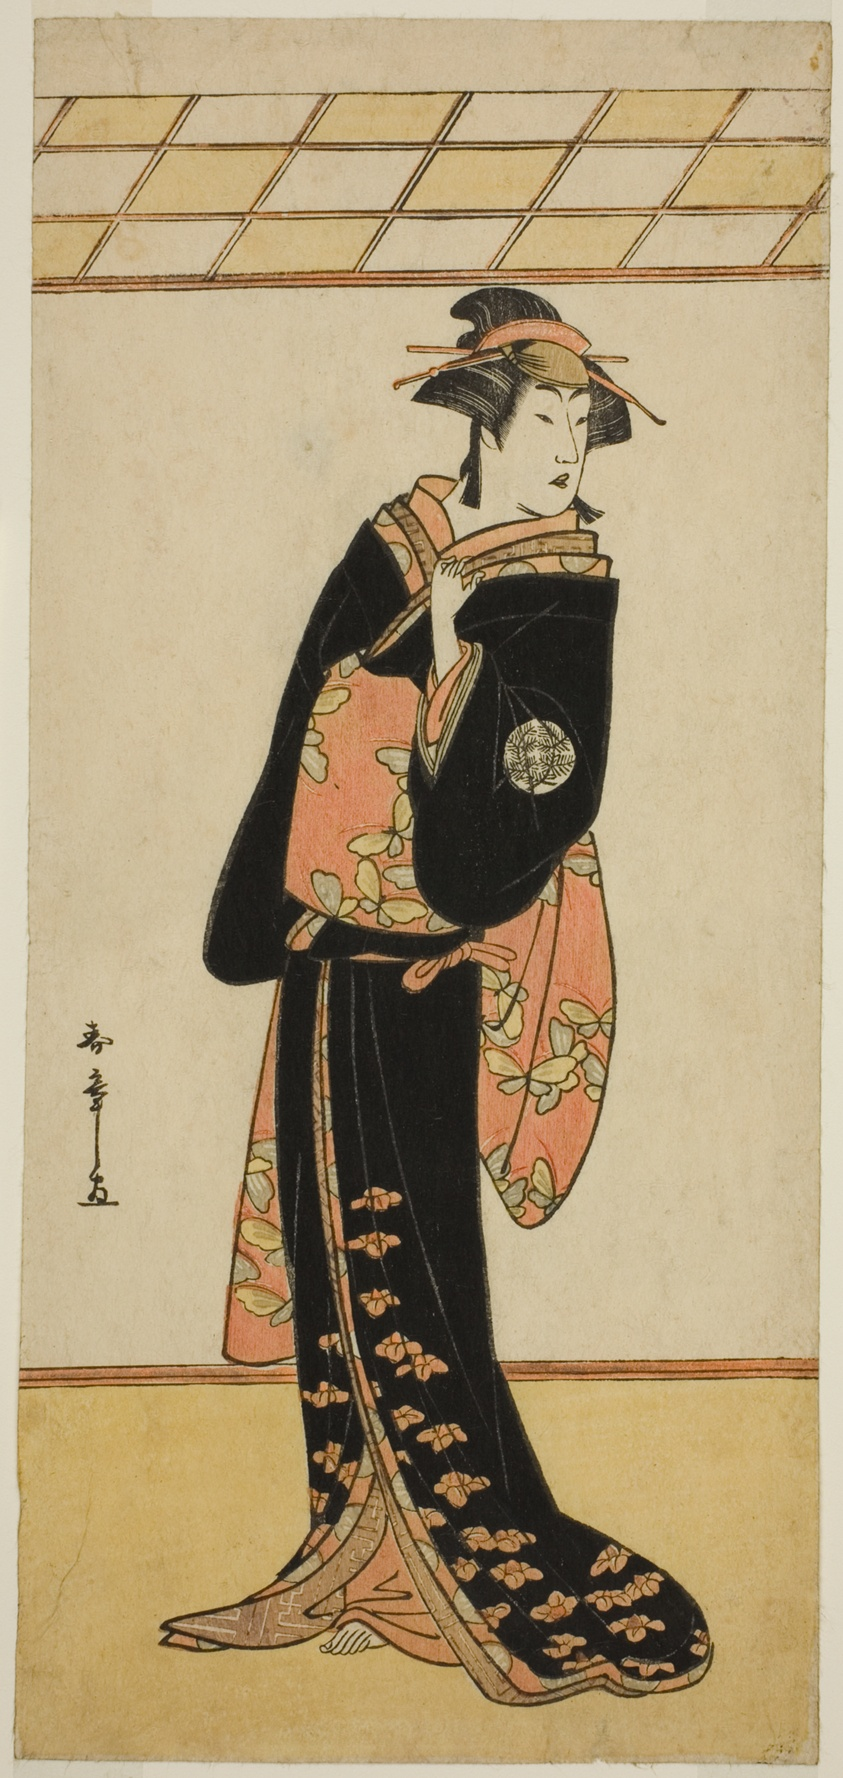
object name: Print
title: The Actor Nakamura Riko I as Lady Manko (Manko Gozen) (?) in the Play Soga Musume Choja (?), Performed at the Nakamura Theater (?) in the First Month, 1784 (?)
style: Japanese (culture or style)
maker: Katsukawa Shunsho 勝川 春章; Japanese, 1726-1792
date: c. 1784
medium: Color woodblock print; hosoban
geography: Japan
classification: woodblock print; print; asian art